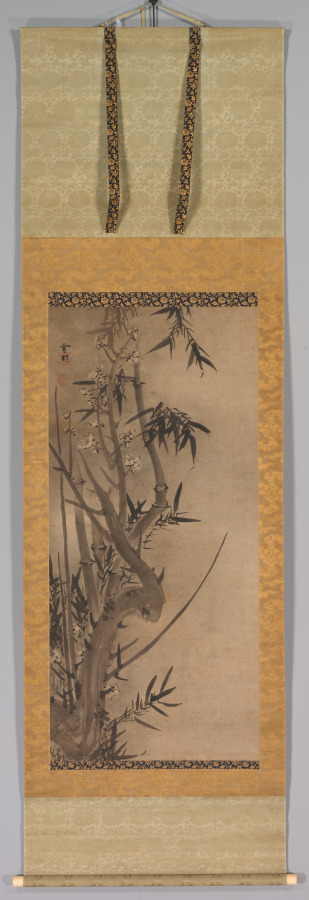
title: Bamboo and Plum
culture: Japan, Muromachi period (1392–1573)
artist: Sesson Shūkei (Japanese, active 1504-c. 1589)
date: 1500s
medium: hanging scroll; ink on paper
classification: Painting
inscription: signed: "Sesson"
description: This painting of a white plum (or prunus) and bamboo was once part of a triptych. A central image of the demon-queller Zhong Kui was flanked by this painting and one of a red plum and bamboo. The paintings would have been suitable to hang after the turn of the new year, when Zhong Kui would drive out evil demons, and the year’s first flowers were in bloom. Sesson hailed from what is now Ibaraki prefecture in northern Honshu. A Zen monk, he spent much of his career in the Kanto region, and developed a distinctive style uninhibited by formal training in the Kano atelier.